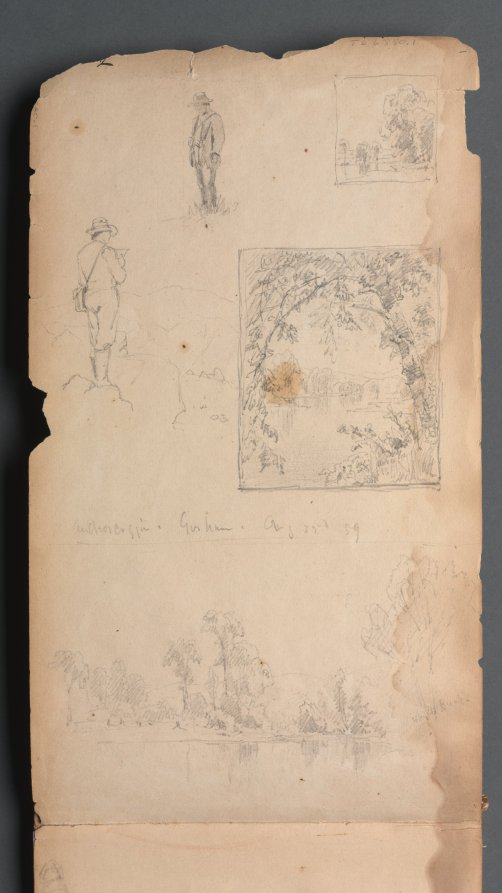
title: Sketchbook, page 01: Self Portraits with Vignittes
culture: America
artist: Sanford Robinson Gifford (American, 1823–1880)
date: 1859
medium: graphite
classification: Bound Volume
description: Gifford was an American landscape painter belonging to the second generation of Hudson River school artists. Based in New York City with a studio at the Tenth Street Studio Building, Gifford took annual summer trips to the Catskills, the Adirondacks, and other scenic locations in New England. This sketchbook accompanied the artist on his expedition in 1859 to New Hampshire and Maine, where he drew sites such as Dixville Notch, the White Mountains, and Peaks Island, Casco Bay. Gifford used such graphite studies as the basis for oil paintings worked up in his studio, such as A Home in the Wilderness (1866).